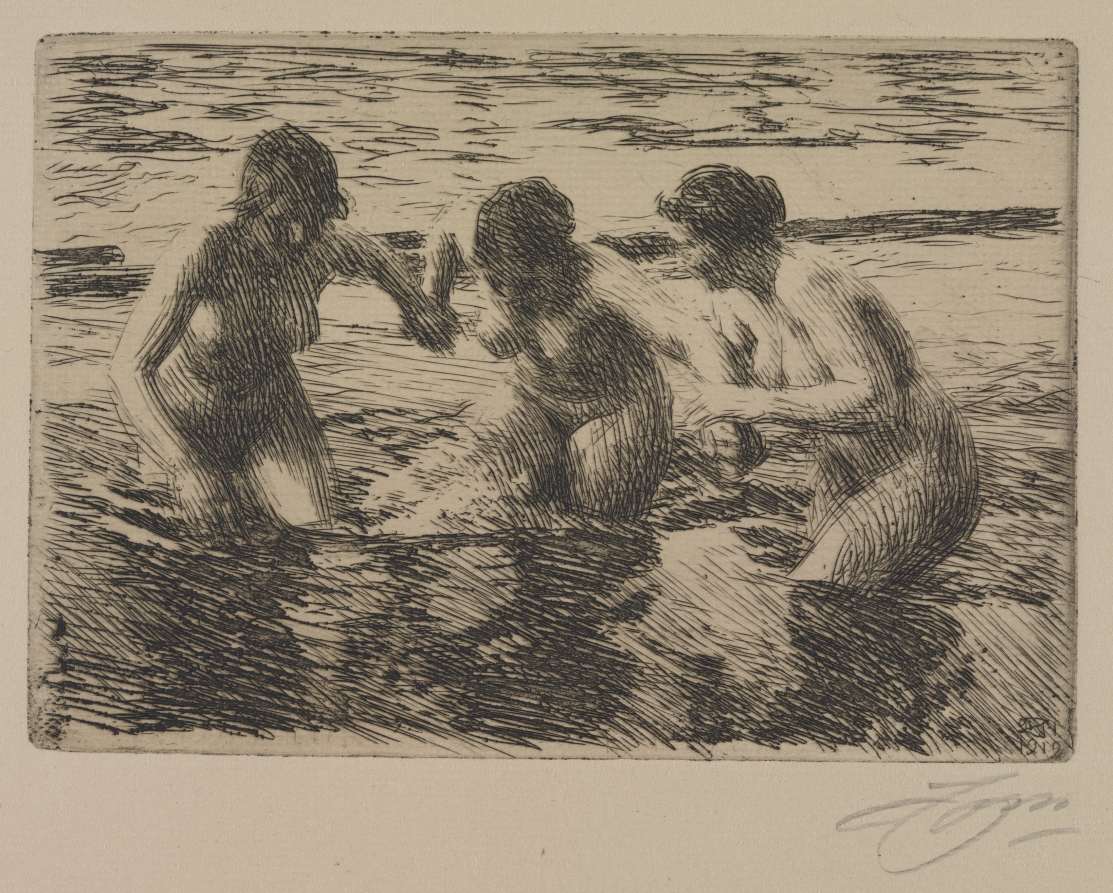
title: Against the Current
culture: Sweden, 20th century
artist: Anders Zorn (Swedish, 1860–1920)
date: 1919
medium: etching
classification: Print